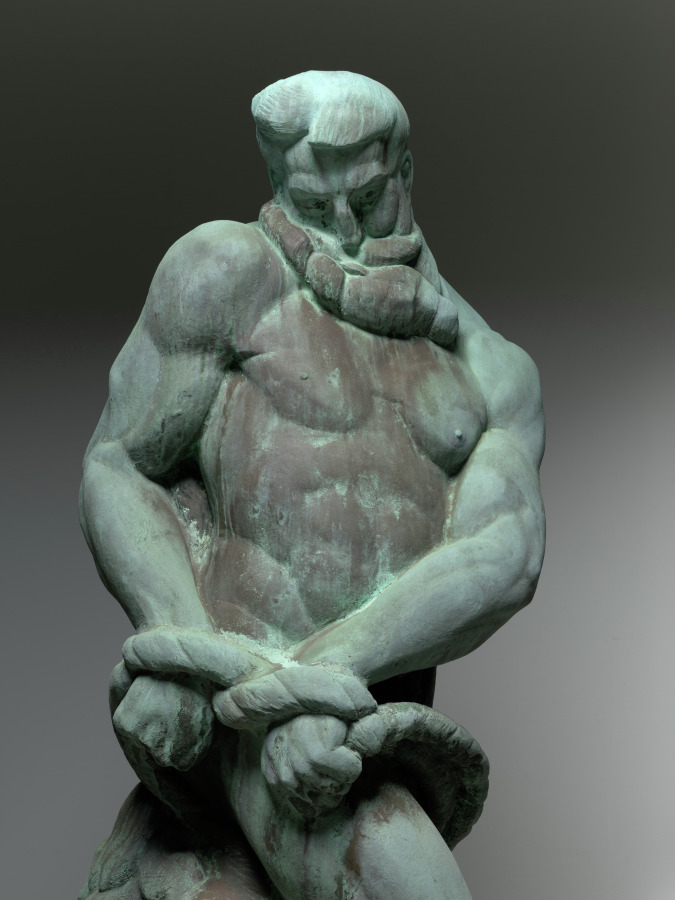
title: The City Fettering Nature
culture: America, Ohio, Cleveland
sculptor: Alexander Blazys (American, born Russian Empire [now Lithuania], 1894–1963)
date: 1927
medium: bronze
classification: Sculpture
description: Alexander Blazys, a Lithuanian immigrant, became a leading sculptor in Cleveland during the 1920s, when he created The City Fettering Nature for the Cleveland Museum of Art’s grounds. In this composition, Utility and Beauty, two characteristics of the city, are shown as intertwined figures attempting to subdue Nature’s power. The brawny figure of Nature, still standing despite this attack, struggles to free himself from the restraints.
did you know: This monumental bronze sculpture weighs 1,500 pounds and requires a crane to install.